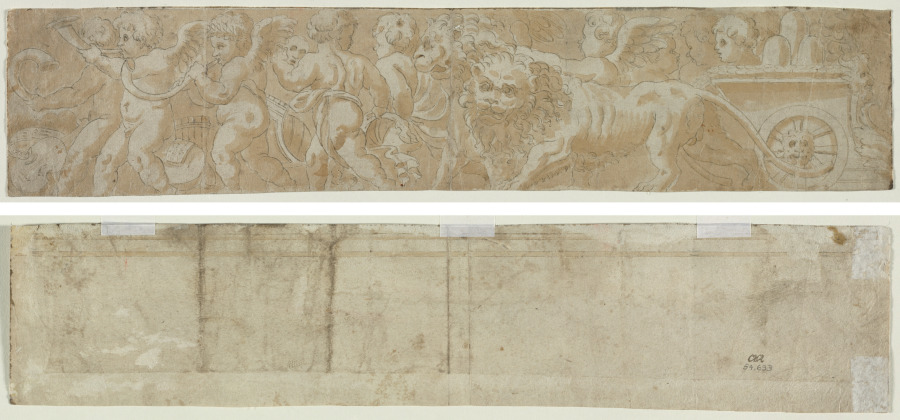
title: Chariot Drawn by Lions with Amorini (recto) Partial Architectural Study (verso)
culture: Italy, 16th century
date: first half 1500s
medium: pen and brown ink and brush and brown wash over black chalk; framing lines in brown ink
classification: Drawing